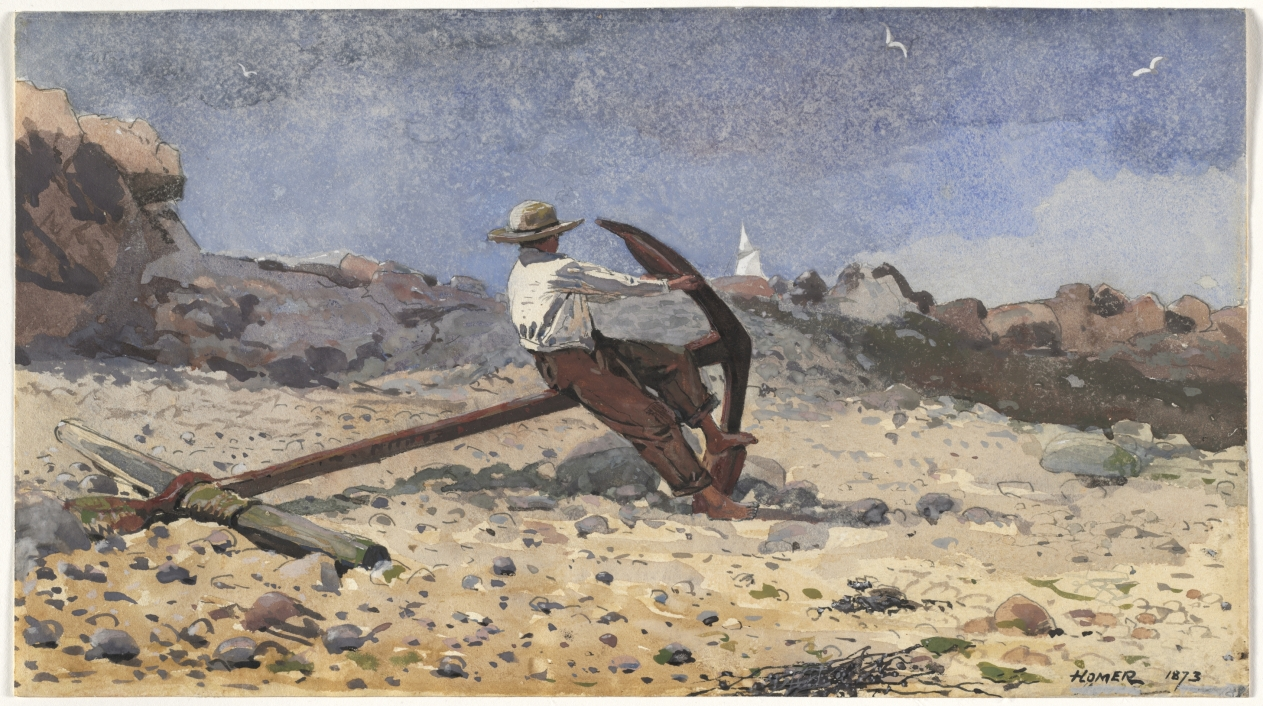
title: Boy with Anchor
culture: America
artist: Winslow Homer (American, 1836–1910)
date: 1873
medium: watercolor and gouache with graphite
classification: Drawing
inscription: signed, lower right, in black watercolor: homer 1873; signed, lower right, in black watercolor: homer 18[illegible, partially painted out]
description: In this work from a series of watercolors produced in Gloucester, MA, in the summer of 1873 Winslow Homer evokes the fraught nature of the local fishing industry by focusing not on the perilous work of adults, but rather the children they leave behind. In Boy with Anchor, the massive anchor pointing toward the sea foreshadows the weight of the boy’s maritime destiny. The work is an early example of Homer's talent for evoking atmospheric effects and his interest in technical variety. Presumably working outdoors, Homer layered fluent washes of blue, gray, and brown transparent watercolor over his graphite underdrawing to flesh out the beach and sky. He built up the hot, pebble-studded surface of the beach by using dense gouache to draw textural detail and created the broken cloud pattern in the sky by lightly blotting his wet blue wash. The picture’s formal tensions between warm and cool colors, outline and wash, and transparency and opacity mirror the emotional tension of the scene.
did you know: The mottled texture of the sky is an example of Homer’s blotting technique—a subtractive process in which he applied a wash of water, sprinkled some breadcrumbs, and then gently rubbed the paper with his fingers in order to absorb the extra color, leaving behind a granulated texture.